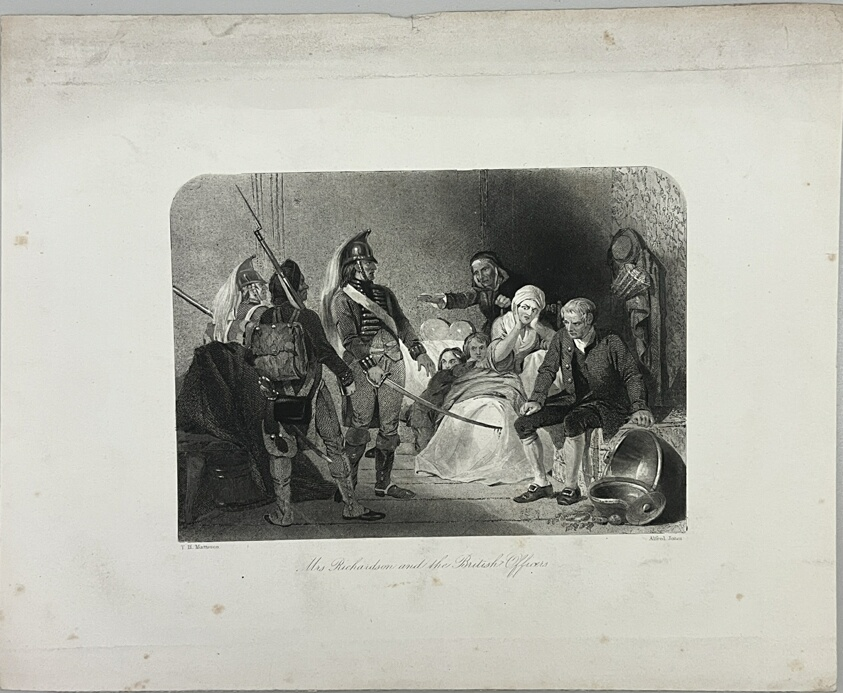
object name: Print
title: Mrs Richardson and the British Officers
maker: Alfred Jones (English, active in America, 1819-1900); after Tompkins Harrison Matteson (American, 1813-1884)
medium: Etching on paper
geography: England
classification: reproduction; print; prints and drawing